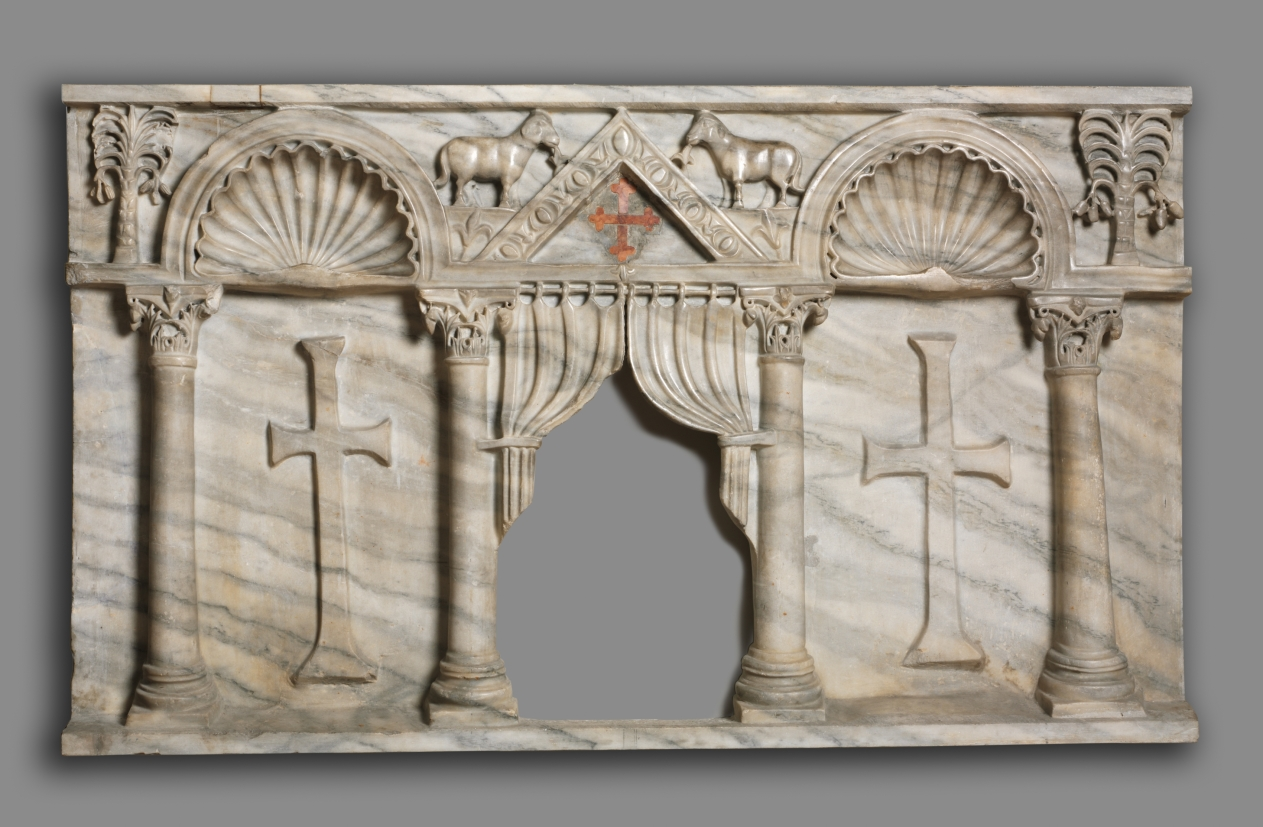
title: Altar Front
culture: early Byzantium, Constantinople or Ravenna, Byzantine period, 6th century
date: c. 540–600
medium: marble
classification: Sculpture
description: This carved marble panel resembles the front of an Early Byzantine sarcophagus, or coffin. While its decoration is typical of those produced in the Italian city of Ravenna during the 500s, its size is considerably smaller, indicating that the panel may instead have been made as an altar front. It is likely that the small window between the center columns with its opened curtains once allowed the faithful to contemplate a precious reliquary placed inside. The decorative repertoire of the panel includes both architectural forms--arches, pediments, and columns--and a number of symbols commonly found in Early Christian art including scallop shells, lambs, palms, and crosses that represent the concepts of life, the sacrifice of Christ, victory over death, and eternal life.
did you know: This marble altar was likely in a Byzantine church that was opulently decorated with mosaics, rich textiles, and gilded lamps. Worshipers would have witnessed the rituals of faith that occurred at the altar, enshrined behind a barrier called a templon, and accessible only to the clergy.